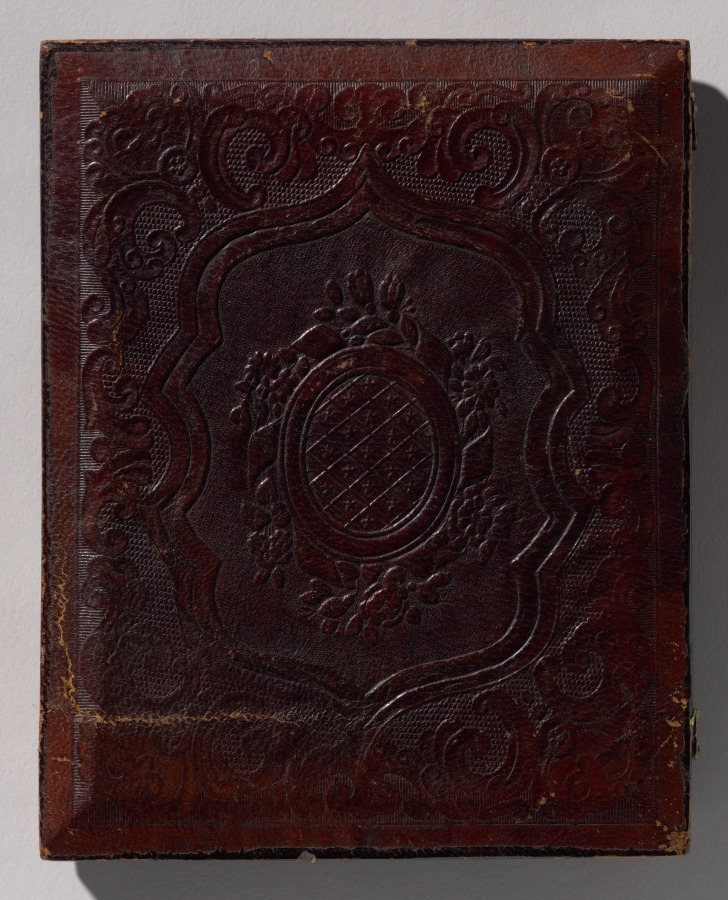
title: St. Anthony Falls from Across the River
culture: America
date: c. 1853–54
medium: daguerreotype, half-plate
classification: Photograph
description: In this image of St. Anthony Falls, the unidentified daguerreotypist made an "instantaneous view" of a remarkable natural wonder, rendering its specific geological formation with exacting clarity. Above a narrow channel where the Mississippi River runs between steep bluffs in Minneapolis, Minnesota, the falls churns away at the bedrock over which it descends. Named by Father Louis Hennepin during his travels in 1680, it is the only significant waterfall on the entire Mississippi River. The specific motivations of the photographer remain unknown. He or she may have wished the photograph to be scientific and documentary, a valuable visual aid for an artist, or just a reminder to a curious resident. No doubt, this daguerreotype was a rare image of the environment's unspoiled condition before the mid 1850s, when demand for an inexpensive energy source irreparably changed this area from a natural to industrial landscape.